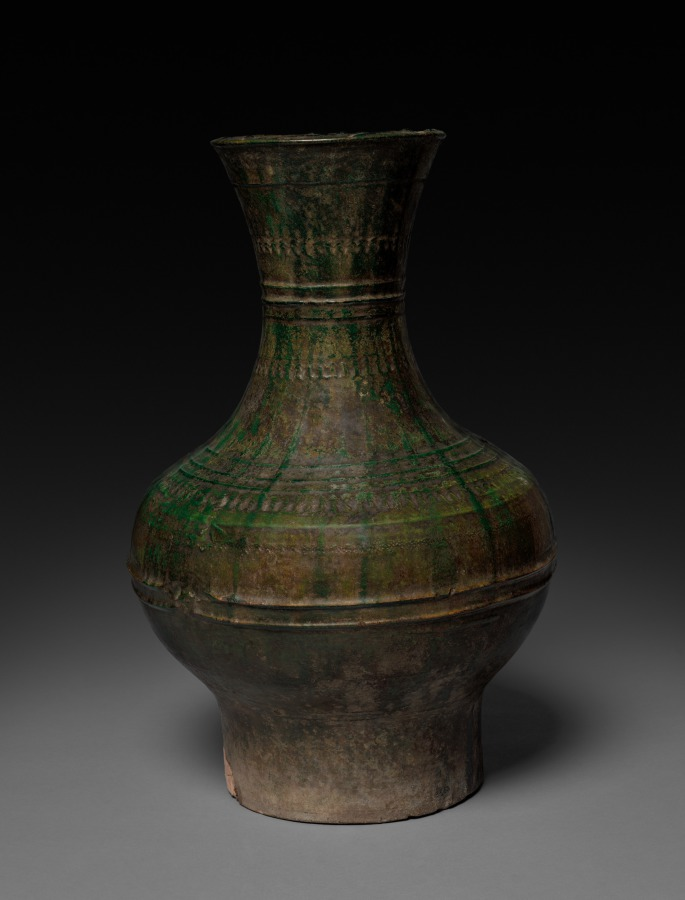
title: Jar (Hu)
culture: China, Han dynasty (202 BCE–220 CE)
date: 206 BCE–220 CE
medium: earthenware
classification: Ceramic